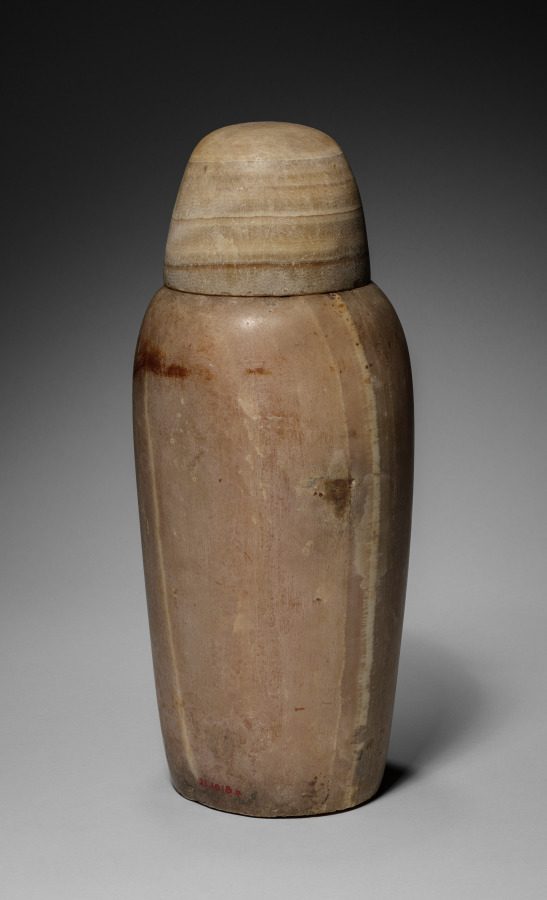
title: Canopic Jar with Falcon's Head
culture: Egypt, Late period (715–332 BCE), Dynasty 26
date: 664–525 BCE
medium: travertine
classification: Funerary Equipment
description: In the process of mummification, the liver, lungs, stomach, and intestines were removed, separately embalmed, and stored in specialized jars known as canopic jars (after a sailor in Greek mythology, who died at the town of Canopus in the Nile Delta and was worshipped there in the form of a human-headed jar). Each organ was identified with one of four funerary deities collectively known as the Sons of Horus: the liver with Imsety (man's head), the lungs with Hapy (baboon's head), the stomach with Duamutef (jackal's head), and the intestines with Qebehsenuef (falcon's head). It was their duty to protect the deceased and restore to him his body parts in the hereafter.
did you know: The falcon-headed deity Qebehsenuef protected the contents of this canopic jar. It contained the remains of the deceased's intestines, which were kept safe for the afterlife.